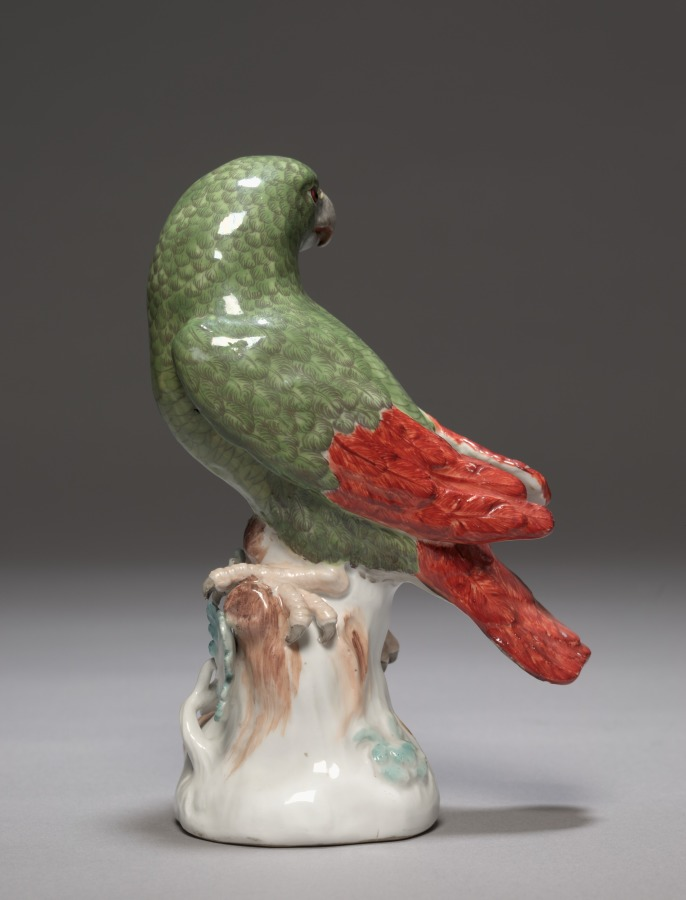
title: Candelabrum with Parrot (Parrot)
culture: Germany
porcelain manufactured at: Meissen Porcelain Factory (German, est. c. 1710)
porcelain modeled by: Johann Joachim Kändler (German, 1706–1768)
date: c. 1740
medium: porcelain mounted in gilt bronze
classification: Ceramic